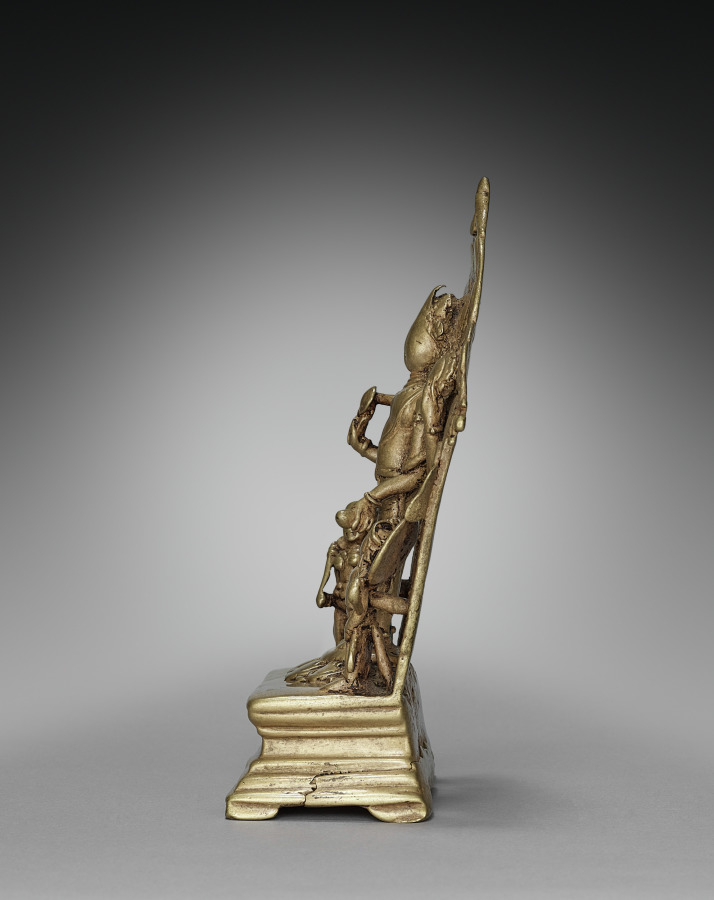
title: Standing Vishnu with Attendants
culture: India, Kashmir, 9th century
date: 800s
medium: brass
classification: Sculpture